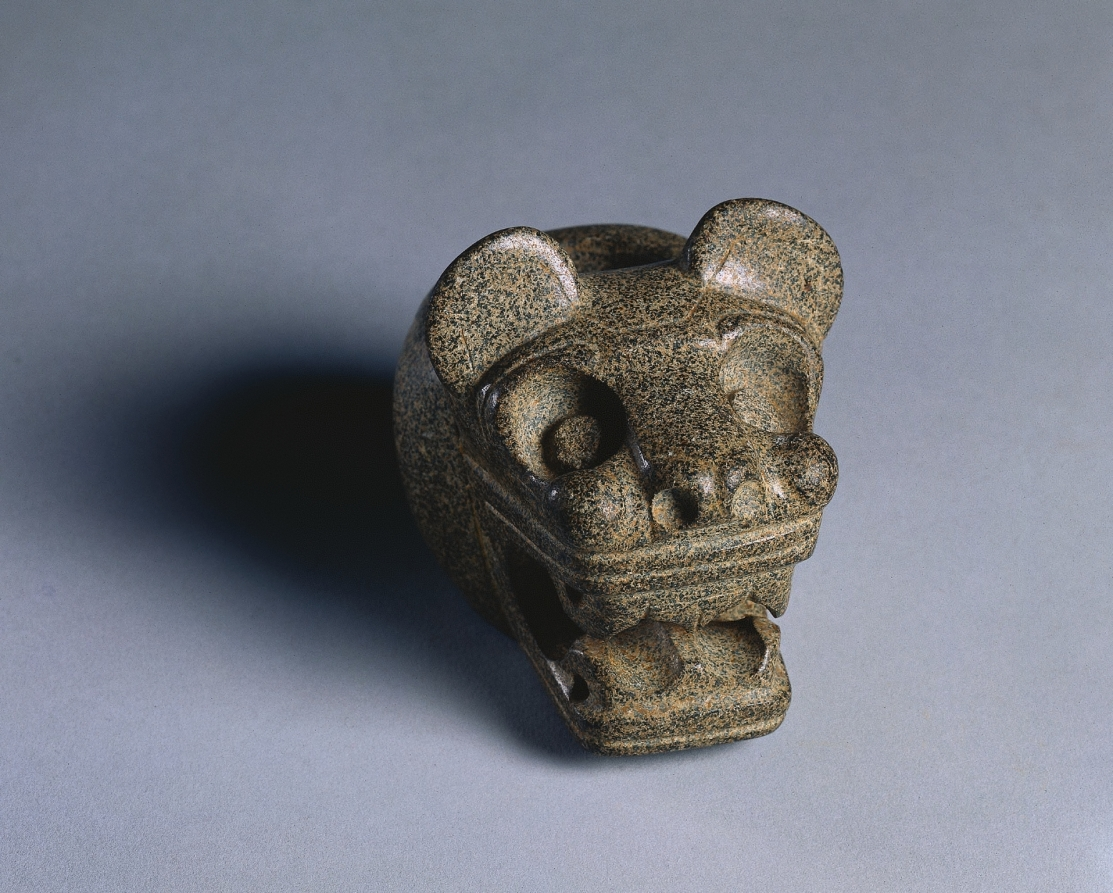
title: Ceremonial Mace (Club) Head: Feline (Jaguar?)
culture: Costa Rica, Southern Nicoya region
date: c. 300 BCE–600 CE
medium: stone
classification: Stone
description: Probably once mounted on wooden shafts, these objects could have served as symbols of chiefly authority, group insignia, the heads of ceremonial weapons, or all three. They eventually were placed in elite graves. The bird may be a male curassow and the feline, a jaguar.